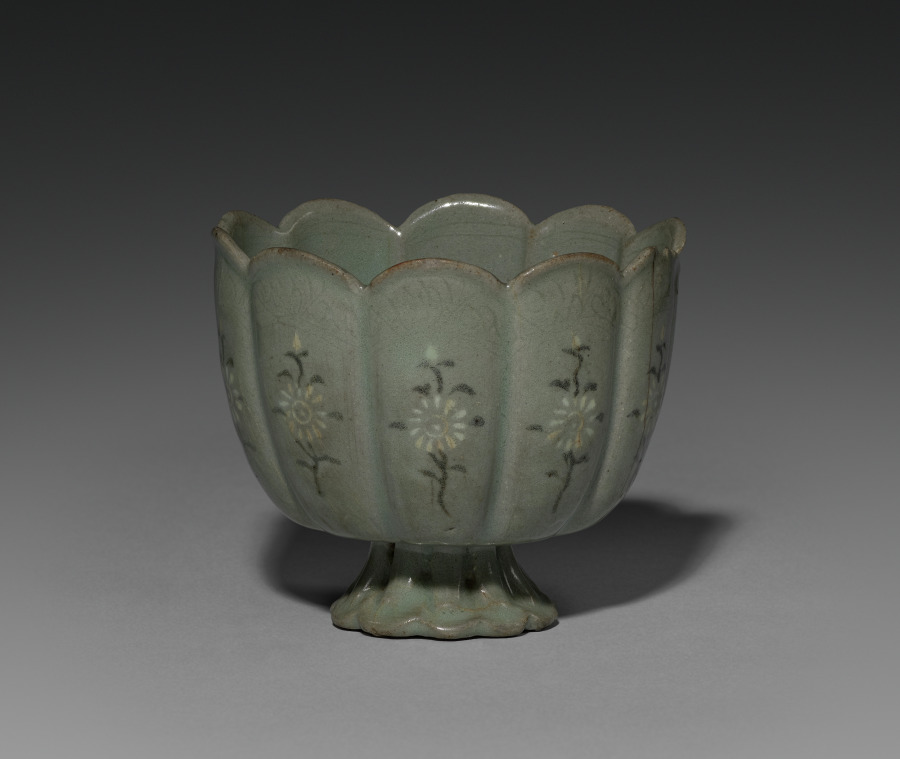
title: Cup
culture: Korea, Goryeo dynasty (918–1392)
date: 1100s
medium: Celadon ware with inlaid white and black slip decoration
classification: Ceramic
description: This celadon wine cup is inlaid with a chrysanthemum pattern that reflects Koreans’ enjoyment of both the poem "Drinking Wine" and the blessings of longevity associated with the Double Nine Festival. The flower design on the saucer is less delicate than the cup, as the cup and saucer were originally from different sets; they were later paired together after each lost its mate.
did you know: Elites of the Goryeo period are known for their love of drinking tea and wine. This type of delicate-looking cup stand not only made their drinking experience more enjoyable, but also showed their refined taste.